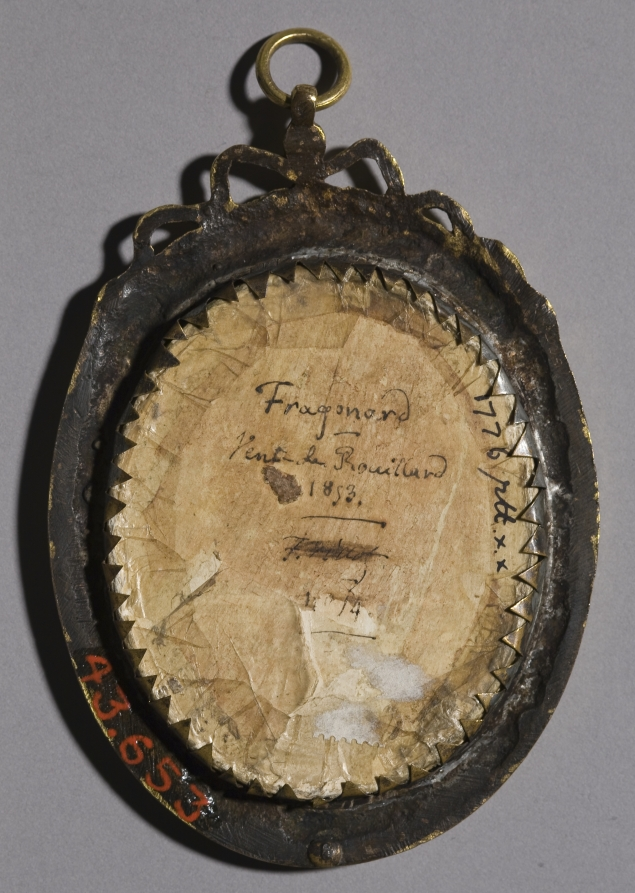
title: Portrait of a Little Girl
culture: France, 18th century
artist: attributed to Anne-Marie Fragonard (French, 1745–1823)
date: c. 1785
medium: watercolor on ivory in a gilt metal frame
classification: Portrait Miniature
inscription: Inscribed on back: Fragonard, Vente de Rouillard, 1853, also F[?] day[?] 14; on edge: 1776 rtt xx.